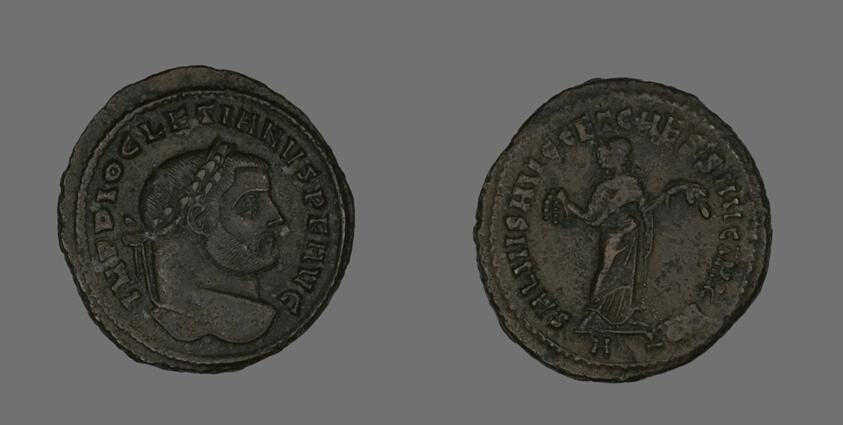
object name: Coin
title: Follis (Coin) Portraying Emperor Diocletian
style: roman (ancient, style or period), ancient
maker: Roman, minted in Carthage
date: 298-299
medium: Bronze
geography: Roman Empire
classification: coin; ancient art